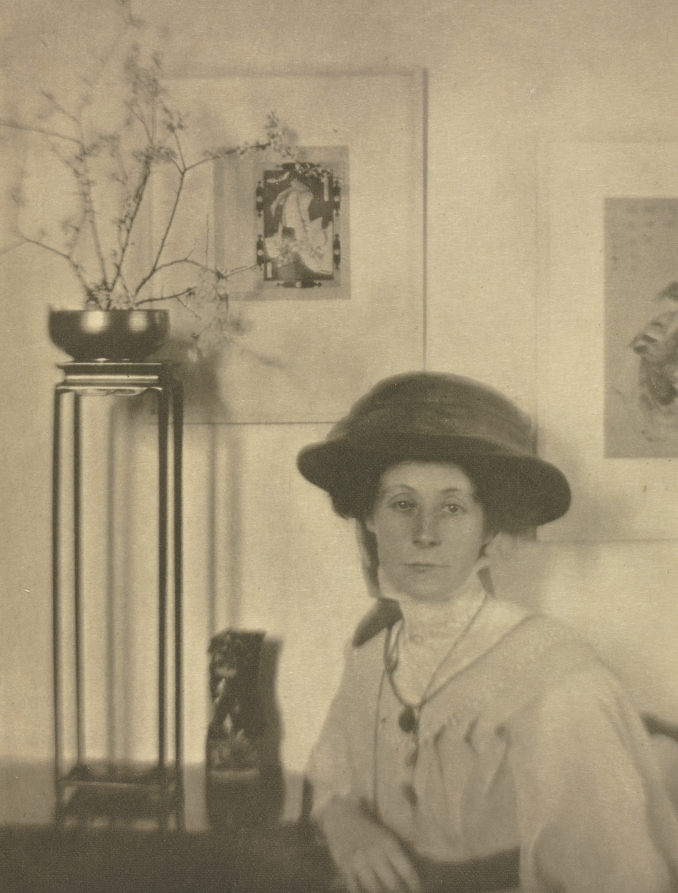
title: Camera Work: East and West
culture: England, 20th century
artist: J. Craig Annan (British, 1864–1946)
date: 1910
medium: photogravure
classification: Bound Volume